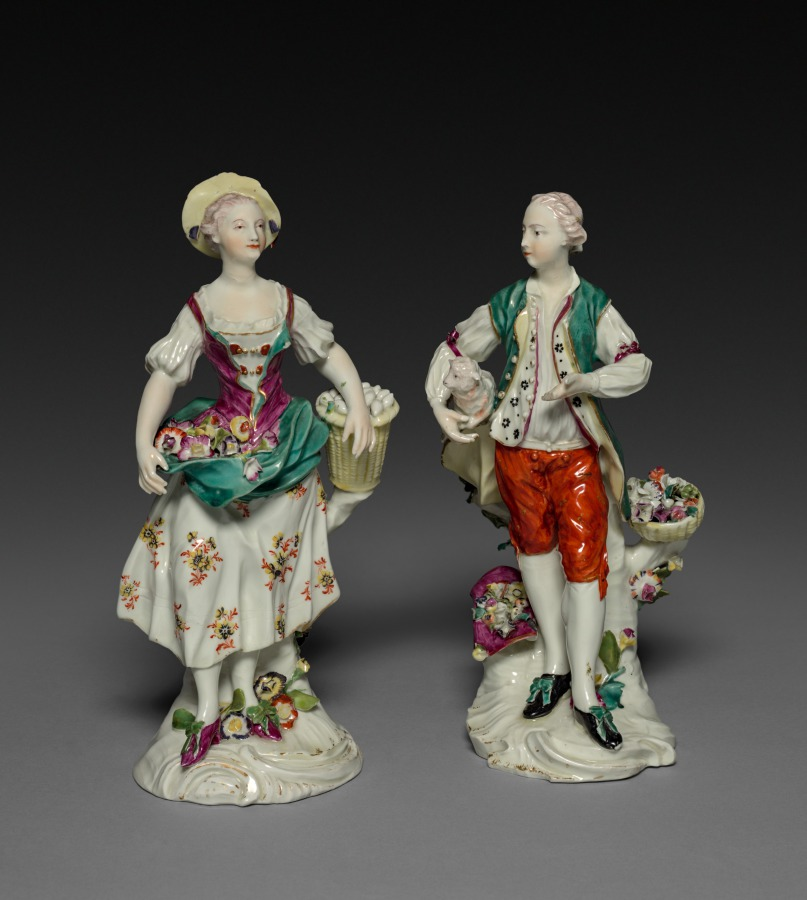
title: Farmer's Wife; Farmer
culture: England, Derby, mid-18th century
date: 1760–1765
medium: soft-paste porcelain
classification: Ceramic